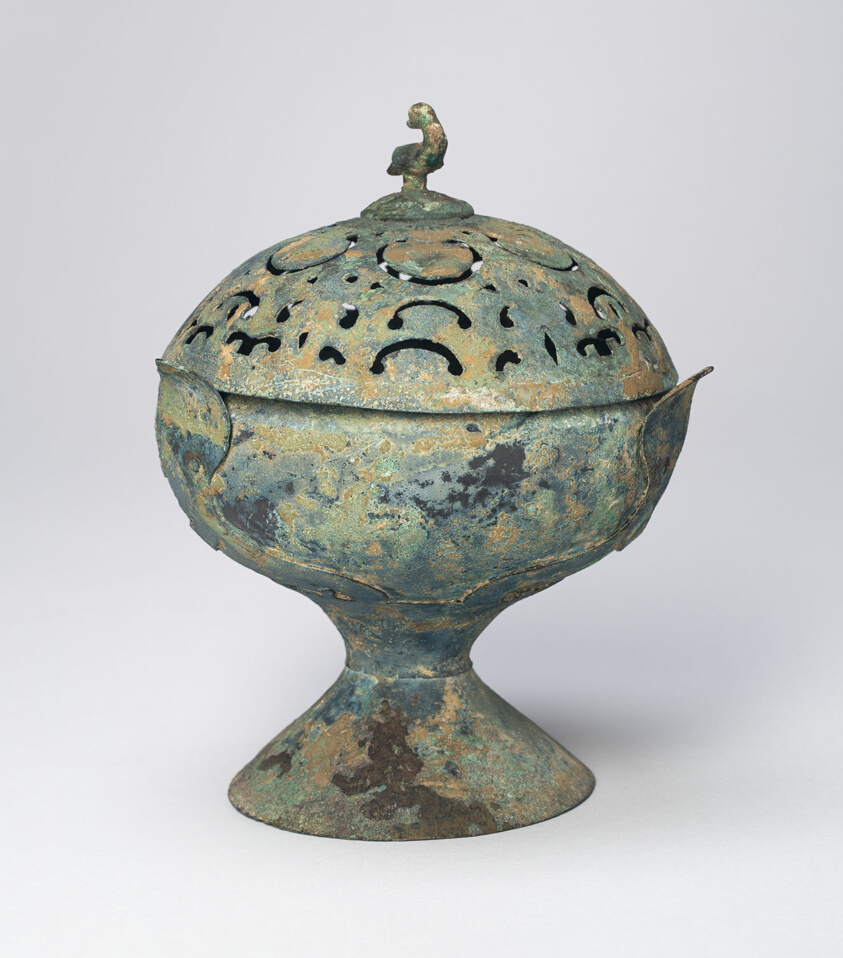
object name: Religious/Ritual Object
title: Incense Burner (Xunlu or Xianglu)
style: Chinese (culture or style)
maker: China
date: Eastern Han dynasty (A.D. 25–220), 1st/2nd century A.D.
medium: Bronze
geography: China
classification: bronze; asian art; ritual objects